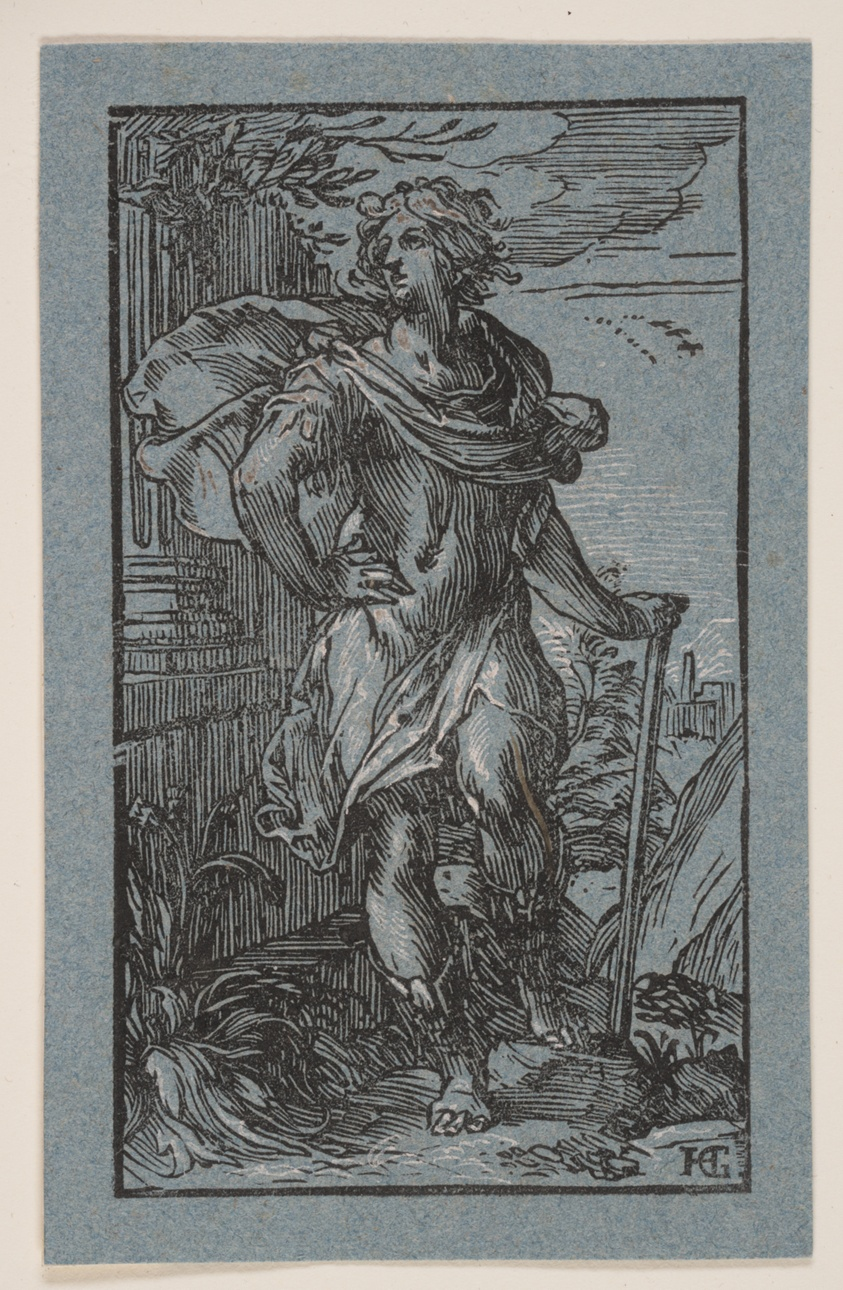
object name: Print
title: Standing Young Man with a Cane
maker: Hendrick Goltzius (Dutch, 1558–1617)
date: c. 1596-1600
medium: Woodcut in black printed on blue paper with white heightening (partially discolored)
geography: Netherlands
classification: woodcut; paper; print; prints and drawing